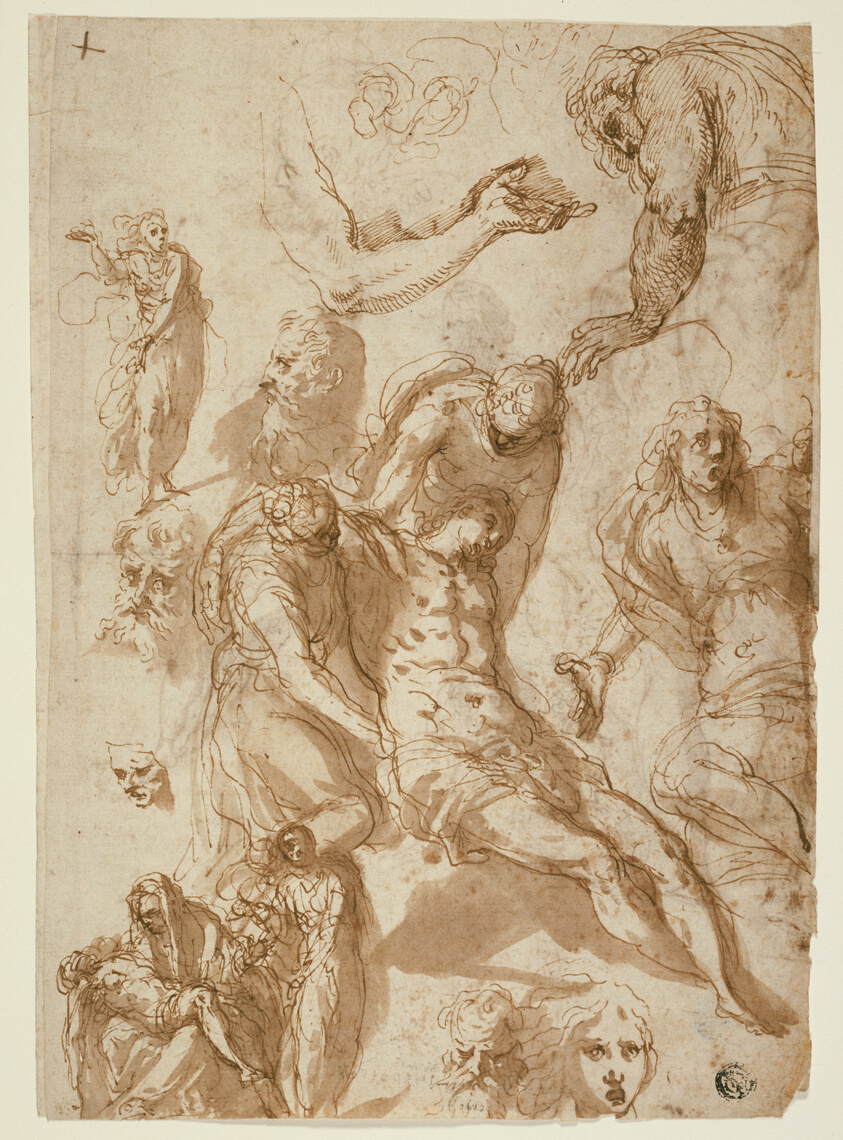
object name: Drawing and Watercolor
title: Sketches for a Lamentation and a Pietà, and of Various Figures, Heads, and an Arm (recto); Sketches of the Dead Christ, and of Various Figures and Heads (verso)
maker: Jacopo Negretti, called Palma il Giovane; Italian, c. 1548-1628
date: 1580 (recto); 1576/80 (verso)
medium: Pen and brown ink with brush and brown wash (recto and verso), on ivory laid paper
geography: Italy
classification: ink with wash; drawings (visual works); prints and drawing